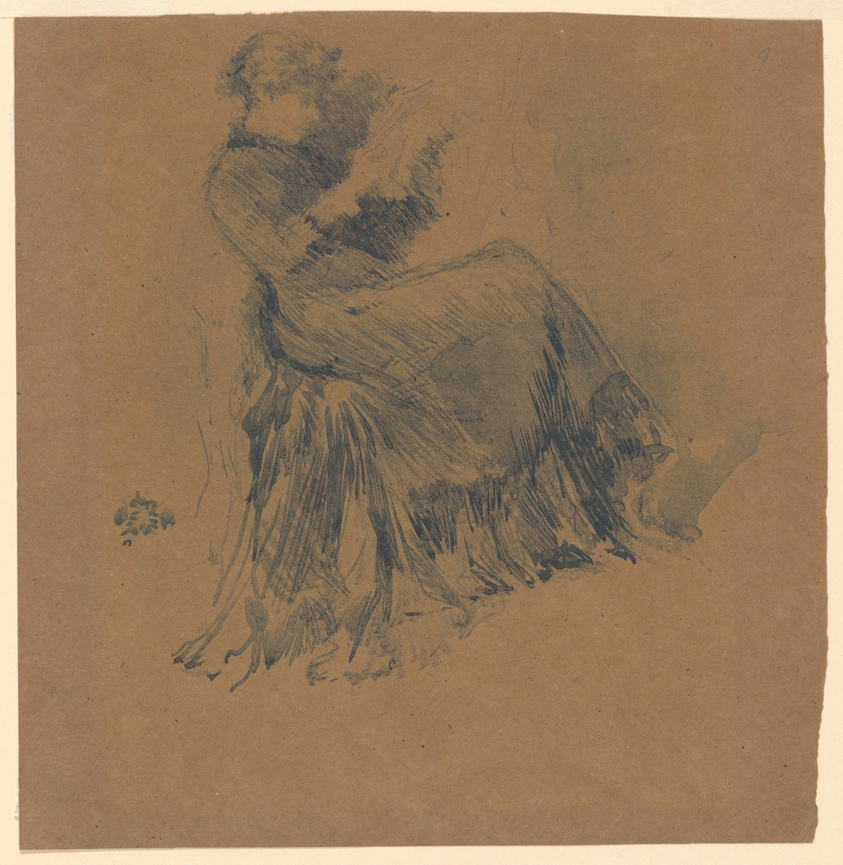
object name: Print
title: Study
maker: James McNeill Whistler (American, 1834-1903)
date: 1878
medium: Lithotint in blue, with scraping, on brown wove paper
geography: United States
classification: lithotint; lithograph; print; prints and drawing; paper